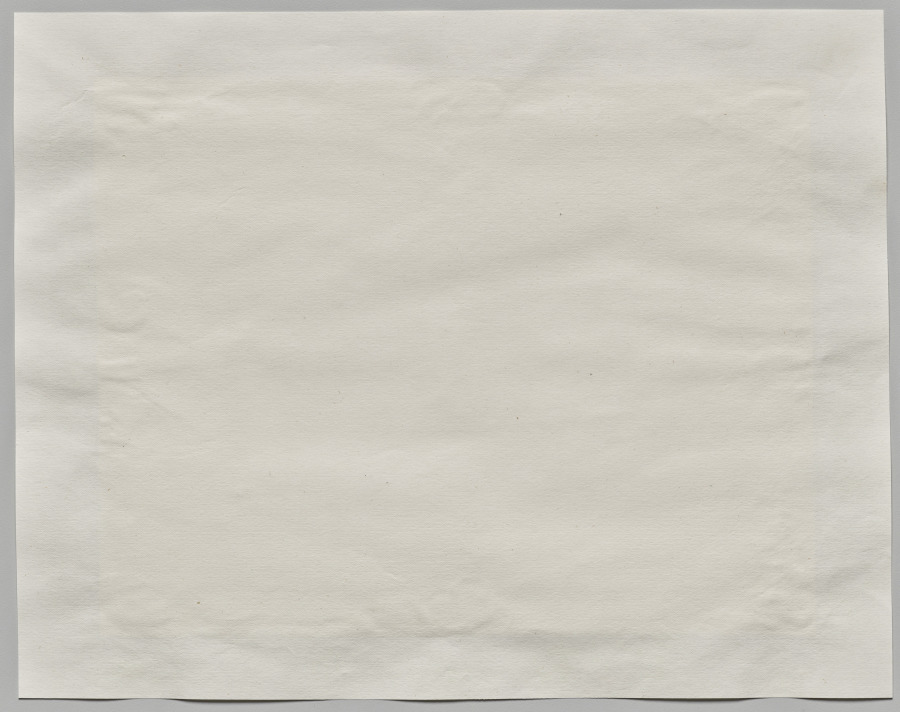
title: Untitled (River, Hong Kong or Macau, China)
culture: England, 19th century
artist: William Pryor Floyd (British, 1834–c. 1900)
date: 1866–73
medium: albumen print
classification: Photograph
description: A young art form, photography had not yet fully developed its own visual traditions when William Pryor Floyd was working, so he often borrowed compositional formats from classical landscape painting. Here, he instead daringly placed the stream right in the middle of this composition. It wends its way in gentle S curves into the distance, drawing the viewer’s eye up and across the picture plane, until it disappears into distant trees.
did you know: A photographer’s choice of viewpoint and framing can radically change how we see a landscape.